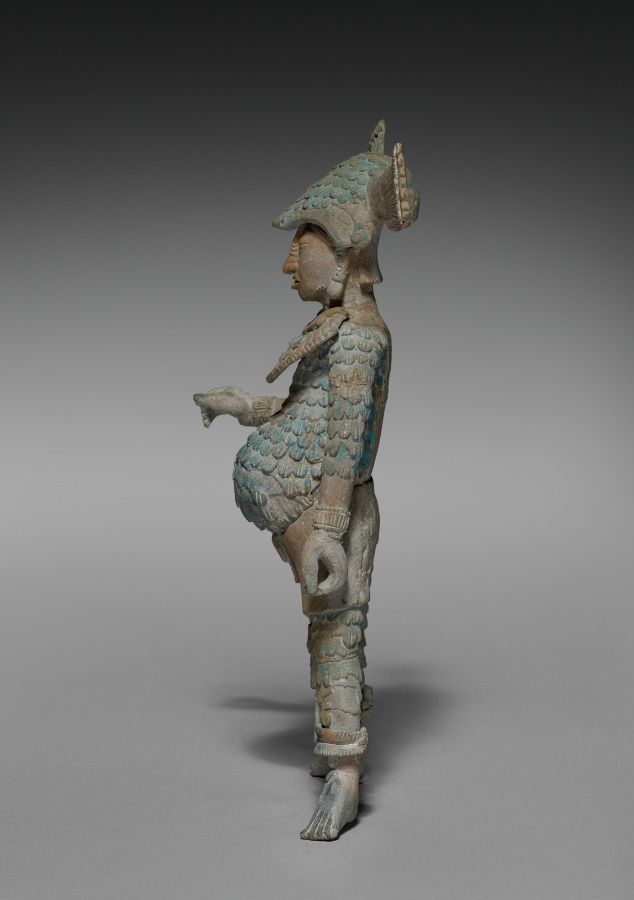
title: Warrior Figurine with Removable Headdress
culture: Mexico, Yucatán, Jaina Island region, Campeche, Maya style (250-900)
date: 600–900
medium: earthenware with pigment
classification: Sculpture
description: The major offerings placed in the Maya graves of Jaina Island were ceramic figurines, some of Mesoamerica's finest, that depict deities and humans in a variety of roles. This warrior, his headdress removable, once probably held weapons and wears either quilted cotton armor or the feathered uniform of a military order. We don't know why such figures are often pot-bellied.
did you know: Maya blue pigment was made by combining clay with indigo in a complex technique developed around the ninth century.